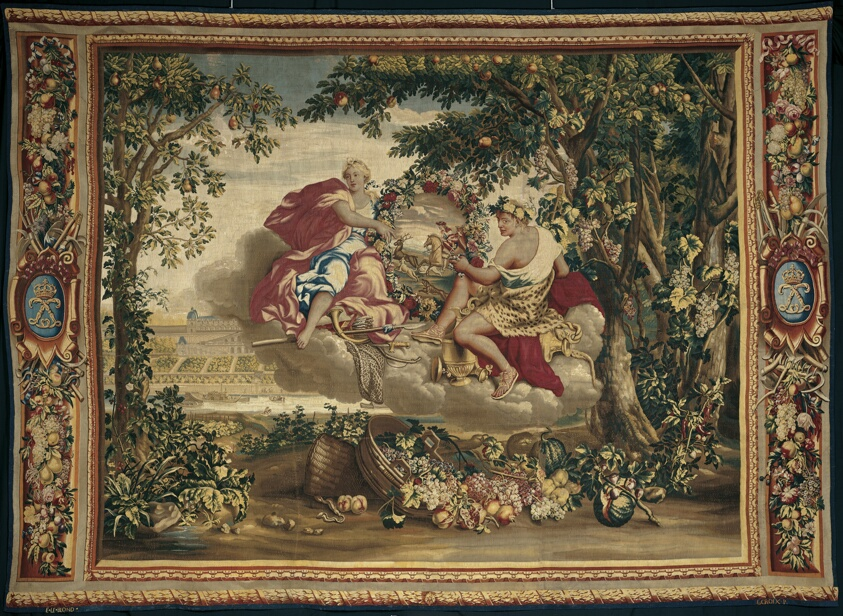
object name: Textile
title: Autumn, from The Seasons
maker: After a design by Charles Le Brun (1619–1690); Woven at the workshop of Etienne Le Blond (1652–1727) and Jean de La Croix (1628–1712) at the Manufacture Royale des Gobelins; France, Paris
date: 1700/20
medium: Wool and silk, slit and double interlocking tapestry weave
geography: Paris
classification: weaving - tapestry; textile